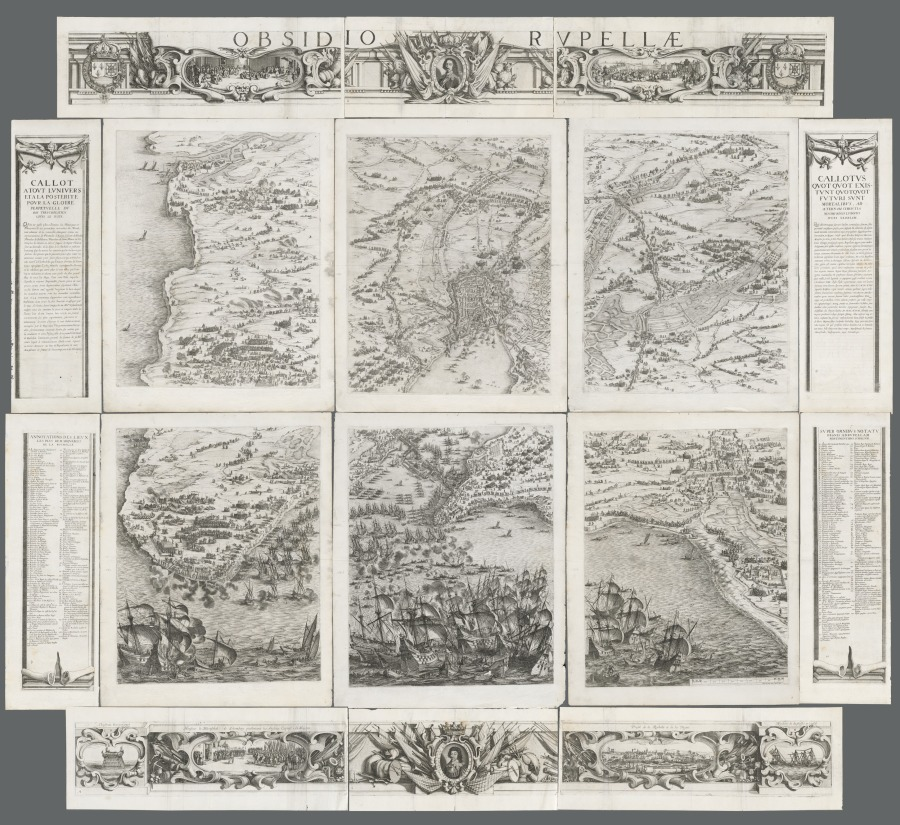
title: The Siege of La Rochelle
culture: France, 17th century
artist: Israël Henriet (French, c. 1590–1661)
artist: Jacques Callot (French, 1592–1635)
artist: Michael Lasne (French, 1590–1667)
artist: and Abraham Bosse (French, 1602–1676)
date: 1628–1630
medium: etching and engraving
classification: Print